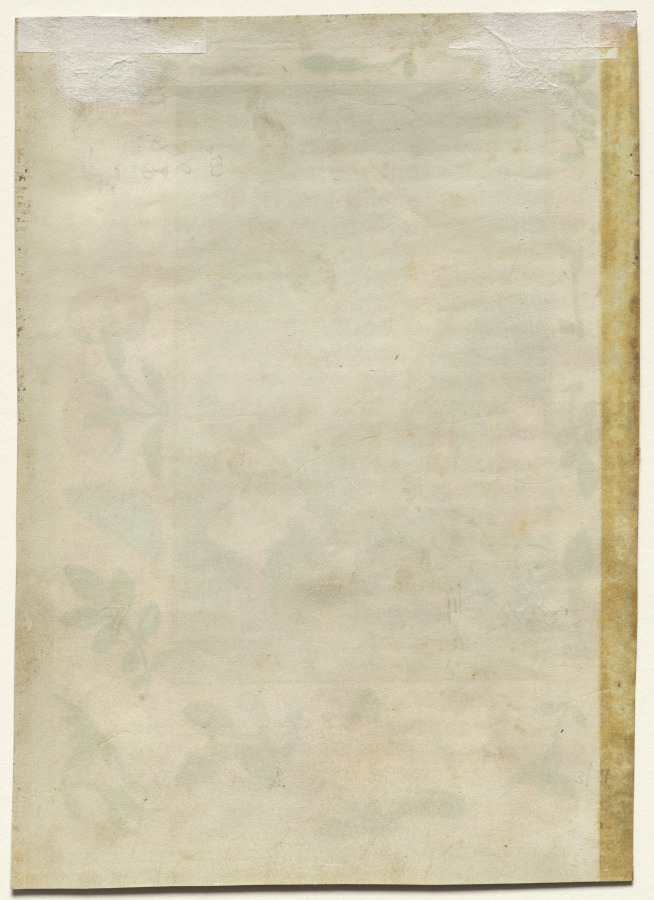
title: Leaf from a Book of Hours: The Raising of the Cross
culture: Germany, Nuremberg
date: c. 1510–20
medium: tempera and liquid gold on vellum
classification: Manuscript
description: This finely painted miniature is the work of an artist familiar with the designs of Albrecht Dürer (1471–1528). Though not deriving from a known engraving or drawing, the style, composition, and especially the modeling of the figure of Christ refer to the draftsmanship and tonalities found in Dürer's works. This miniature depicts the moment the cross is raised. In the foreground, thuggish brutes struggle to bring it upright. The skull of Adam at the foot of the cross signifies that Golgotha was Adam's burial place. In the background, a vivid blue sky recedes into pink as it meets the horizon and a distant town. The inclusion of an illusionistic, trompe l'oeil border, strewn with flowers and butterflies on a gold ground, follows the tradition of Ghent and Bruges, where such borders were first developed during the 1470s and 1480s.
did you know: Books of hours were devotional books popular in the Middle Ages and meant for laypeople, or those not in the clergy.